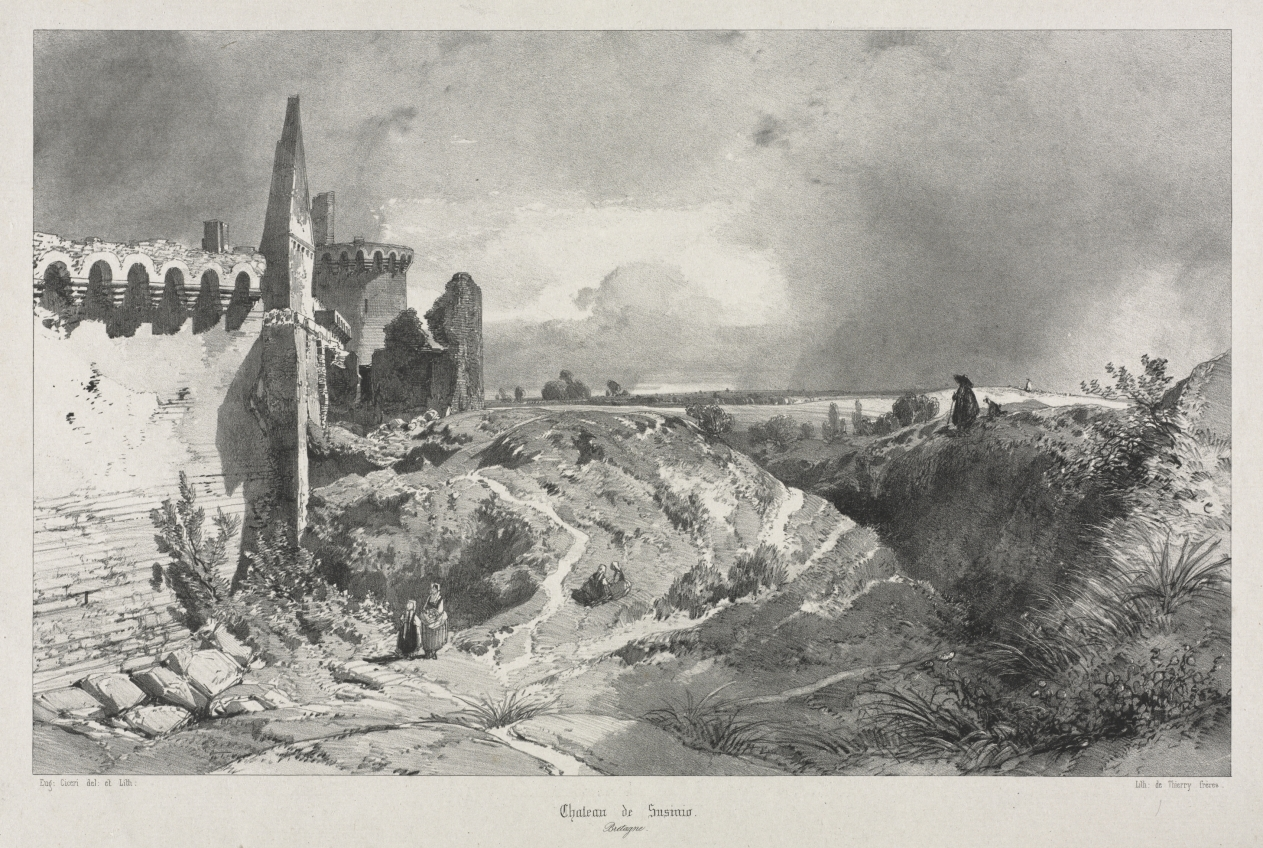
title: Voyages pittoresques et romantiques dans l'ancienne France. Bretagne: Chateau de Susinio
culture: France, 19th century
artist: Eugène Cicéri (French, 1813–1890)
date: c. 1845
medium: lithograph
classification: Print